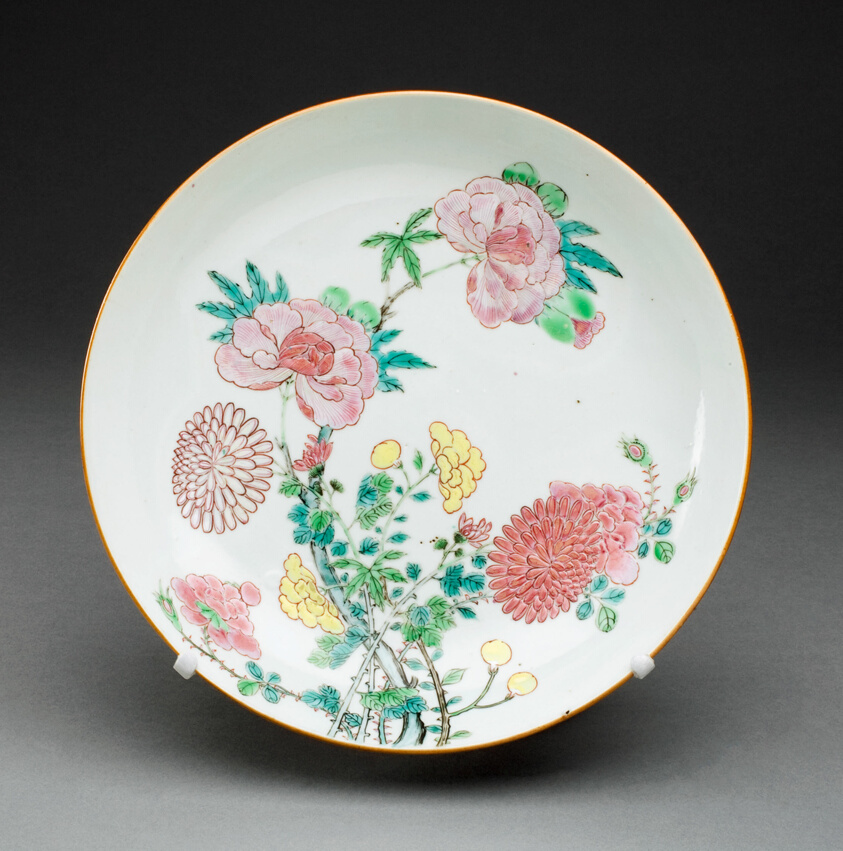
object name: Ceramics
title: Dish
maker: China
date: c. 1725, Qing dynasty (1644–1911), Yongzhen period (1723–1735)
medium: Hard-paste porcelain and polychrome enamels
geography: China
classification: dish (vessel); ceramics; european decorative arts